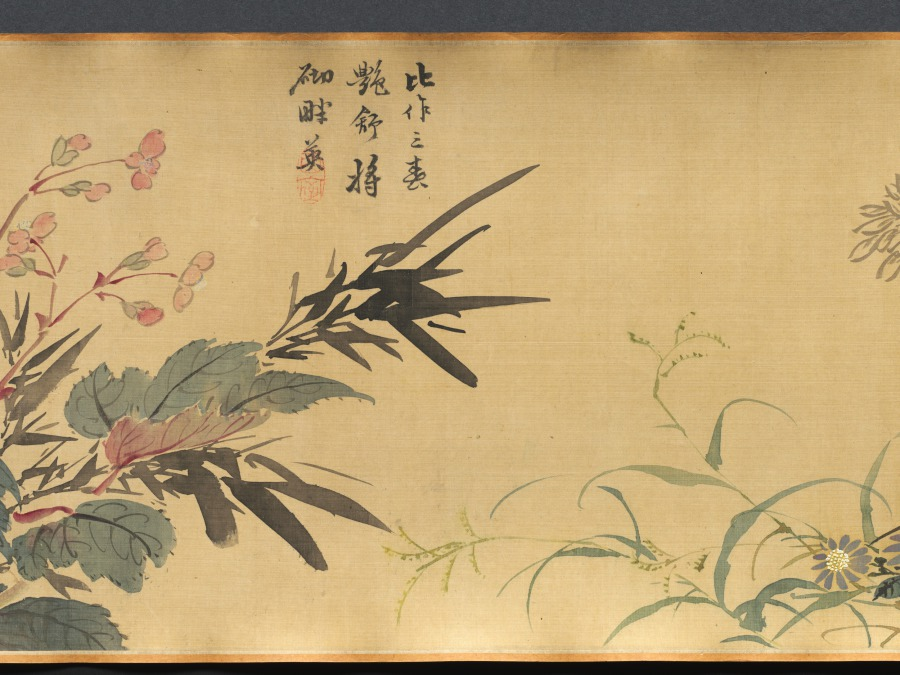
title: Flowers of Four Seasons, with Poems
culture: China, Ming dynasty (1368–1644)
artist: Wang Guxiang (Chinese, 1501–1568)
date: 1531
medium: handscroll; ink and light color on silk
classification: Painting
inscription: Artist's inscription, signature, and 15 seals. Ink Orchids. Sewn as pendants for the man of worth, swaying quiety, fragrance in the valley. [seal] Hsiao-chu ts'un Peony. Wiping his face, the young gentleman Ho [Ho Yen of Wei, Three Kingdoms] appears to have been powdered. His previous life was the perfume-stealing Han Shou [of Chin, 265–419 CE], the fragrance still lingers. [seal] Ts'un-wu chai. Flowering Crab Apple, New Bamboo. Shao-lin [Du Fu, 712–770] had to put down his brush. [Flowering Crab Apple]. Yü-k'o [Wen T'ung, d. 1079) in vain wrote poems about [Bamboo]. [seal] Yu-shih. Lotus Flowers. When she turns her head, half-hidden by a fan, and casts a glance, all the beautiful women become colorless. [seal] K'ang yüeh huai. Loquat. Ripeness in summer. [seal] Lu-chih. Pomegranate Flower. Whenever I remember you I will send my thoughts, but where have you gone--the [skirt] of pomegranate red? [seal] Wu-ho Sheng. Day Lily. Plant the day lily to forget sorrow. [seal] Yu-shih. Chrysanthemum. The untrammelled joy at the eastern fence. [seal] Lu-chih. Begonia. Comparing it to the beauties of Spring, and spreading them out as trimming for the stone steps. [seal] Yu-shih. Hibiscus. In recent years I have always enjoyed looking at flowers; instead of dark red I preferred pink ones. [seal] Jen-sheng i-lou. Narcissus, Camellia. The jade girdle left behind at Lo River. [Narcissus]. The precious pearls glitter before Spring. [Camellia]. [seal] Lu-chih. Heavenly Bamboo (Nandina domestica). A single branch in the wintry season. [seal] K'ang yüeh huai. Plum. Fragrant snow in the Lo-fou Mountains. [seal] Ts'un-wu chai. In the eleventh lunar month of the hsin-mao year of the Jiaqing era [1531], [I] imitated the boneless style of Yüan masters in sketching from life. Guxiang [seals] Yu-shih; Lu-chih. Translated by Wai-kam Ho/Lingyun Shih Liu (1980)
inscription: 2 colophons and 23 additional seals: 1 colophon dated 1632, and 2 seals of Li Jih-hua [Li Rihua] 李日華 (1565–1635); 1 colophon and 2 seals of Xiang Shengmo 項聖謨 (1597–1658); 3 seals of Liang Qingbiao 梁清標 (1620–1691); 6 seals of the Jiaqing 嘉慶 emperor (r. 1796–1820); 9 seals of Ch'eng Ch'i [Cheng Qi] 程琦 (1911–1988)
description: In this painting, flowers are loosely arranged by the seasons: narcissus and peony represent early spring; yellow loquat and lotus, summer; chrysanthemum, autumn; and the plum and evergreen bamboo, winter. The artist added to each flower a poetic line of calligraphy associating each plant with a historic or legendary figure. For example, the chrysanthemum, along with the line “The untrammeled joy at the eastern fence,” refers to the poet Tao Yuanming (died AD 427) who enjoyed chrysanthemums at the eastern fence in his garden. The scroll illustrates Wang Guxiang’s mastery of free brushwork, combining light monochrome ink with transparent colors. In his inscription, Wang says he used the “boneless” style without outlines as developed during the Yuan dynasty (1279–1368). Wang was a native of Changzhou, a city in southeast China known for its rich flora and fauna, and flower-and-bird painting tradition.